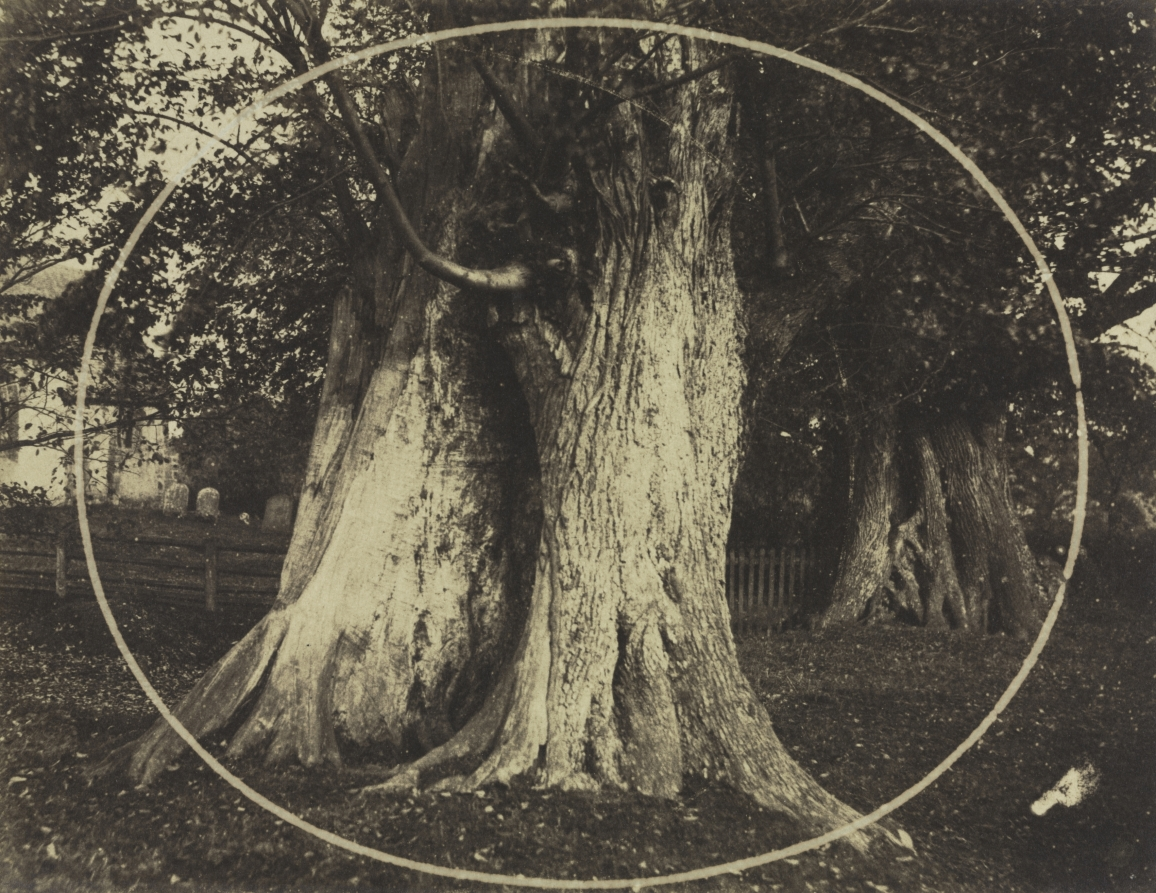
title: Oak Trees in a Graveyard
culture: England, 19th century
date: c. 1852–57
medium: albumen print from wet collodion negative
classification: Photograph